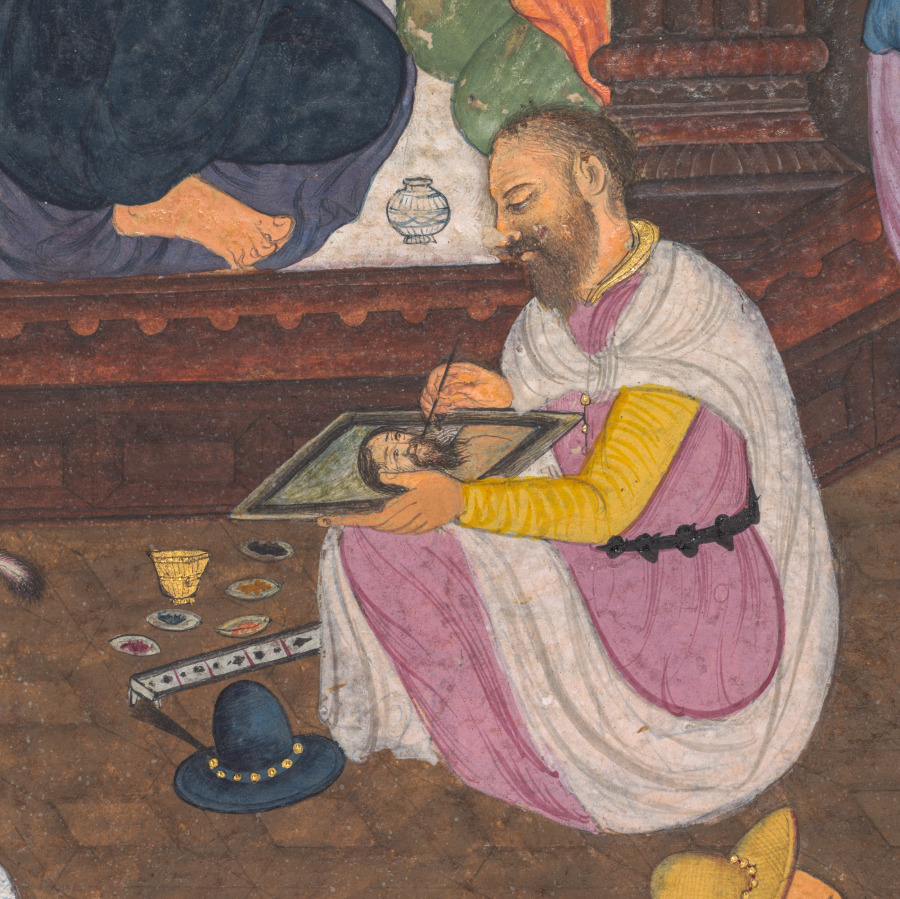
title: Jesus being portrayed by King Abgar’s painter (folio 143 recto), from a Mirror of Holiness (Mir’at al-quds) of Father Jerome Xavier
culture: Mughal India, Allahabad, made for Prince Salim (1569–1627)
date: 1602–4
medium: Gum tempera, ink, color, and gold on paper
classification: Manuscript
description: Jesus sits under a golden lamp with a cloth in his hand, while an artist sits before him, struggling to paint his portrait. The artist had been sent by his king, Abgar of Edessa, who was ill and believed the portrait would cure him. Jesus pitied the artist and pressed his face to the cloth to create a perfect impression. The miraculous cloth became known as the Mandylion and was venerated by Christians as a relic of Christ. The similarity between the names Abgar and Akbar suggests that Father Jerome included this noncanonical story in his biography of Jesus to resonate with and inspire the Mughal emperor.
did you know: Artist’s pigments are arranged in shells next to the brass cup for water.